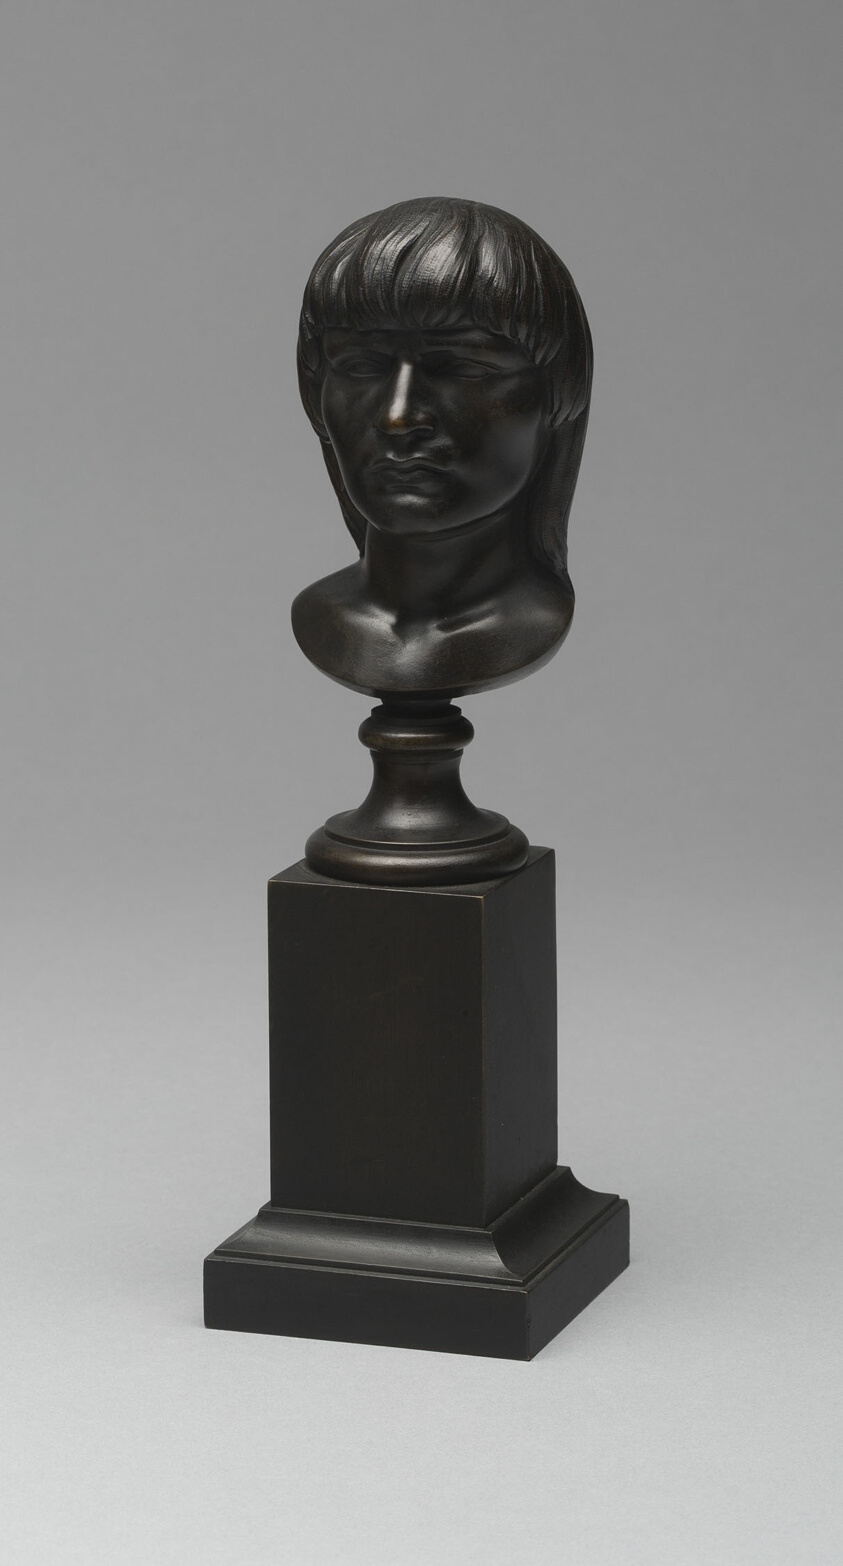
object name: Sculpture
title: Head of an American Indian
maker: Henry Kirke Brown (American, 1814–1886)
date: Modeled 1848–49, cast 1849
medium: Bronze on bronze plinth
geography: United States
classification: bronze; bust/head; sculpture; miniature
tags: people, portraits